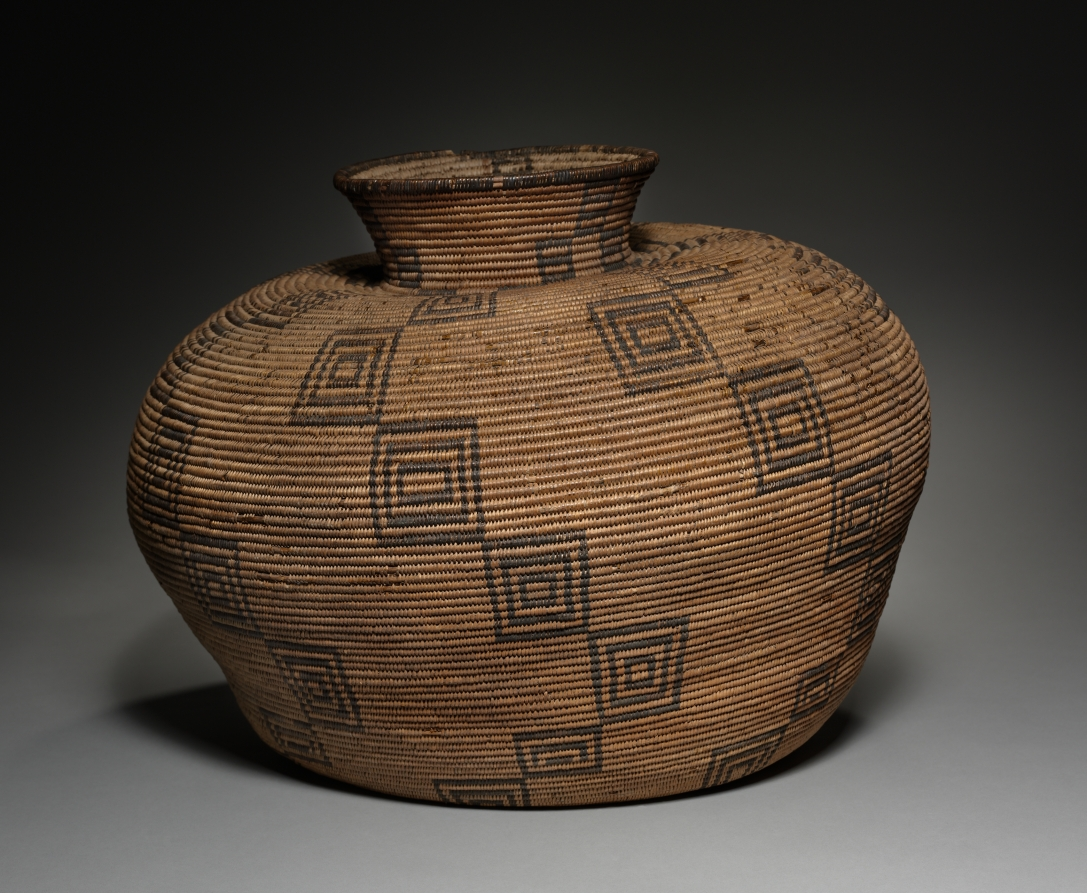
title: Grain Storage Basket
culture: Southwest, White Mountains, Arizona, Apache, 19th century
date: late 1800s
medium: coiled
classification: Basketry